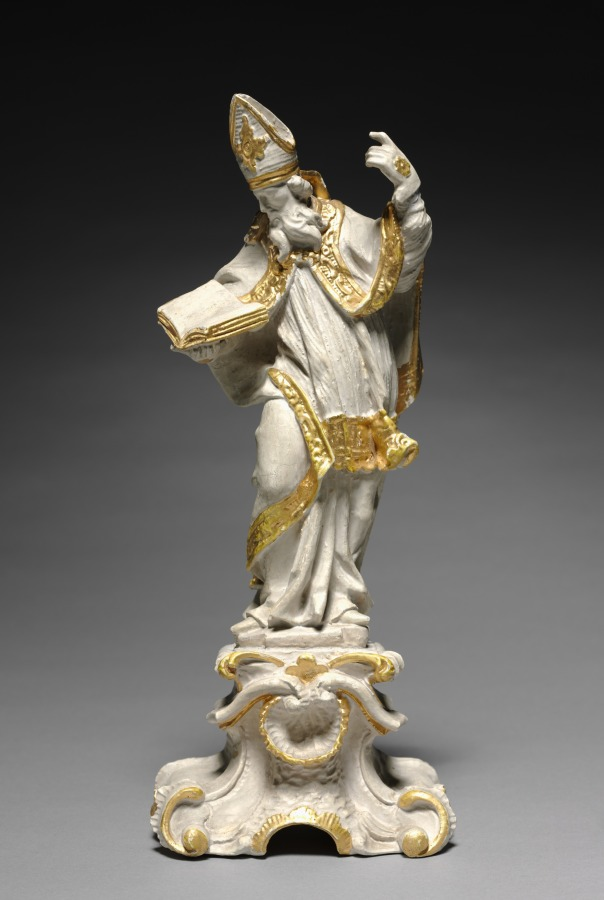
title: Bishop Saint Statuette Pair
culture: Germany, 18th century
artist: attributed to Ferdinand Tietz (Austrian, 1708–1777)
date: c. 1740–1750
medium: painted and gilded wood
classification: Sculpture